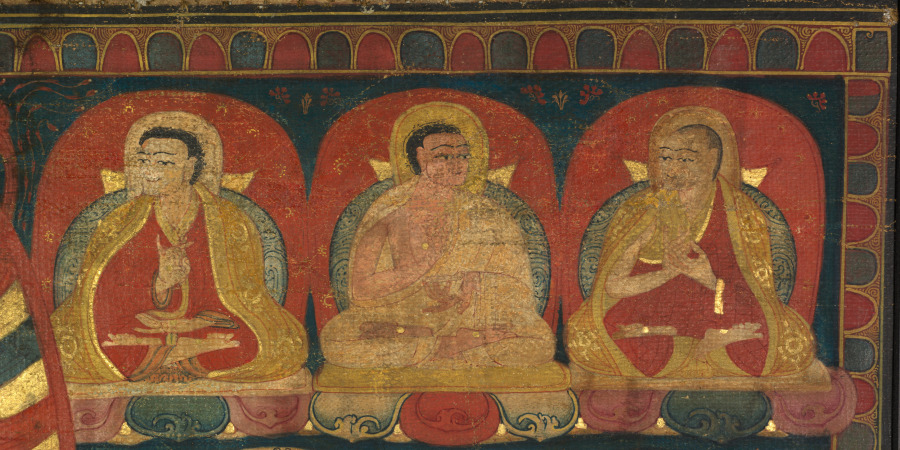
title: Tantric Buddha Vairochana as Vajrasattva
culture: Central Tibet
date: c. 1150–1200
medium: gum tempera, ink, and gold on cloth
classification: Painting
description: The seated Buddha dominating the composition is identified as Vairochana because of his hand gesture, the mudra communicating supreme enlightenment in which the index finger of one hand is grasped by the fingers of the opposite hand. His golden color and the tiny vajra—a six-pronged ritual object representing a thunderbolt—balanced on top of his finger suggest that he is in the guise of Vajrasattva, the summation of all enlightened beings. In his crown is the image of a monk, who is probably the guru of the donor, the small monastic figure at the lower right next to the lotus pedestal.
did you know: A mantra written behind the figures invokes their living presence in the thangka painting.